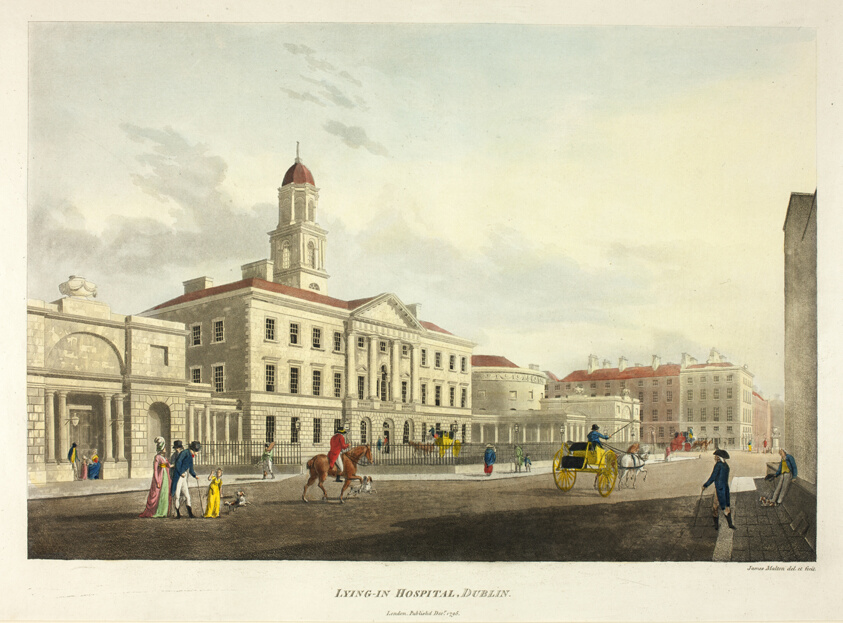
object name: Print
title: Lying-In Hospital - Dublin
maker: James Malton (English, 1761-1803)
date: published December 1795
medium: Hand-colored aquatint in black on ivory wove paper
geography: England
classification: aquatint; print; prints and drawing